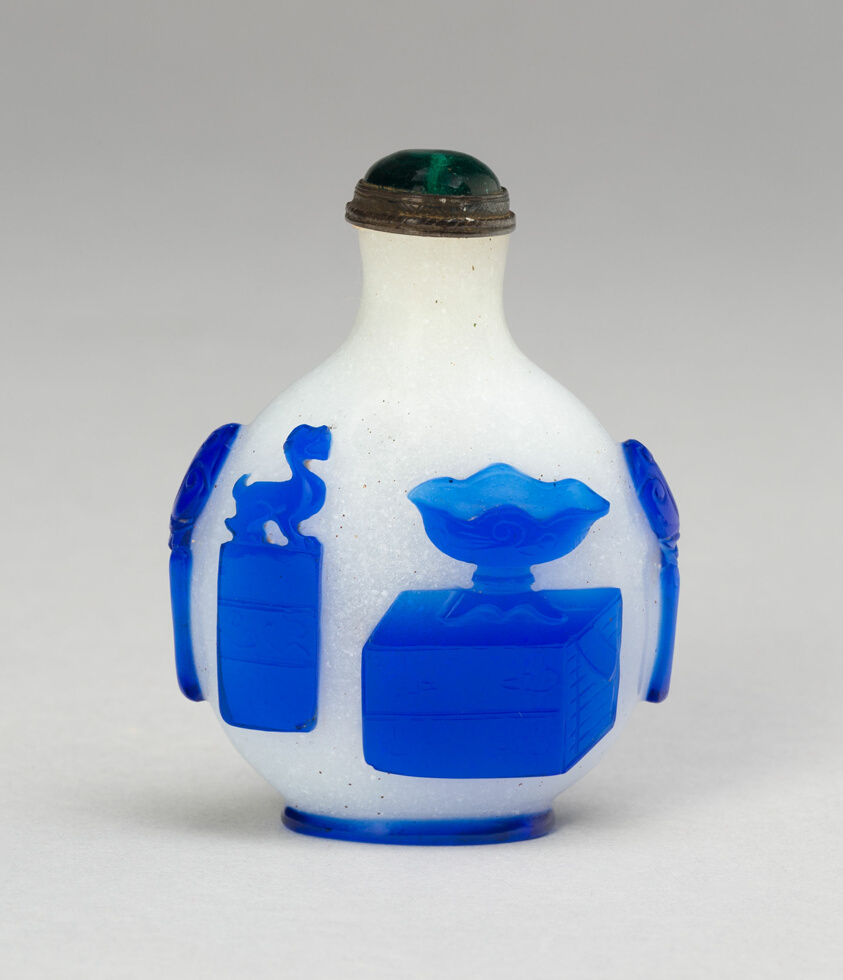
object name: Vessel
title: Snuff Bottle with Stem Bowl, Seal, and Books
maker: China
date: Qing dynasty (1644–1911), 1750–1800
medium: Glass; blue overlay on misty snowstorm ground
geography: China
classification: snuff bottle; asian art; vessel